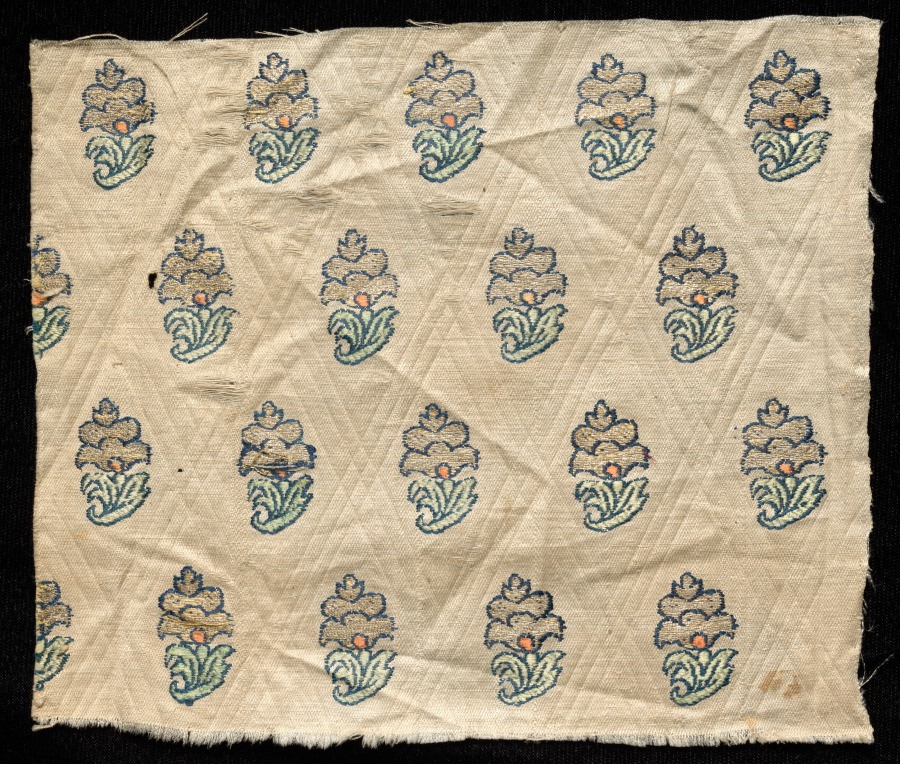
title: Fragment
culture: India, 19th century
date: 1800s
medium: brocade; ecru cotton ground, silk and metal thread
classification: Textile